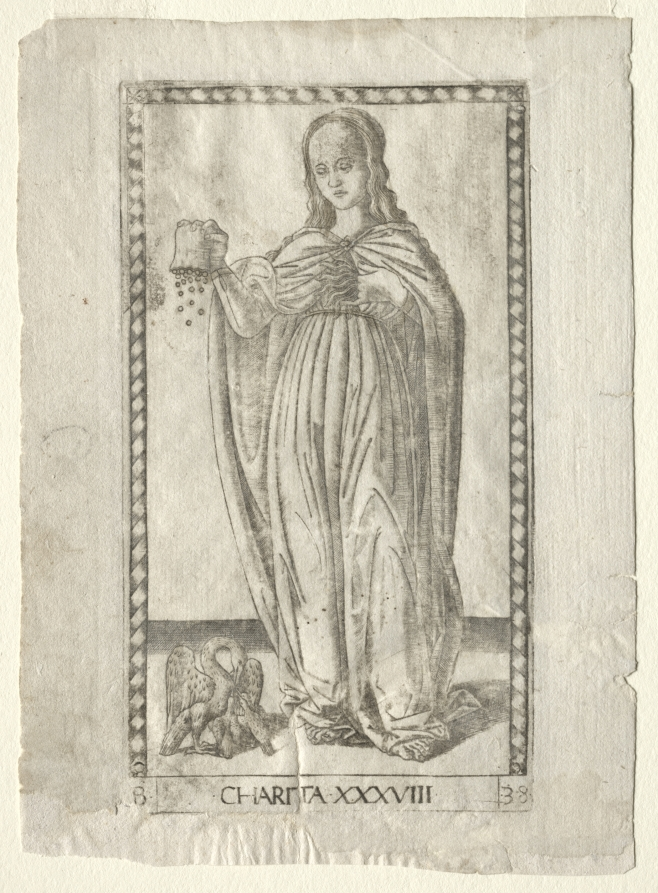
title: Charity (from the Tarocchi, series B: Cosmic Principles & Virtues, #38)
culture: Italy, Ferrara, 15th century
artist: Master of the E-Series Tarocchi (Italian, active 1460s)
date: before 1467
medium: engraving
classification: Print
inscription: Lettered below the image of Charita (Charity): ·B· / ·CHARITA·XXXVIII· / ·38·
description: This engraving is part of the group marked with the letter “B,” and named Cosmic Principles and the Virtues, which comprises the three Universal principles (Light, Time, and Space) alongside the four cardinal virtues (Prudence, Temperance, Fortitude, and Justice) and the three theological ones (Faith, Hope, and Charity). The latter are a Christian concept originating from a passage in the first Book of Corinthians (1 Corinthians 13:13). Here personified as a full-length female figure, Charita (Charity) simultaneously personifies the love of God (caritas Dei or amor Dei)—by parting her cloak with her left hand in order to reveal her flaming heart—and the love of one’s neighbor (caritas proximi)—by shaking coins from an open purse with her right hand. Charity looks downcast at her lower left and toward her symbol, a pelican. This bird was thought to open its breast with its beak to feed its young with its own blood.